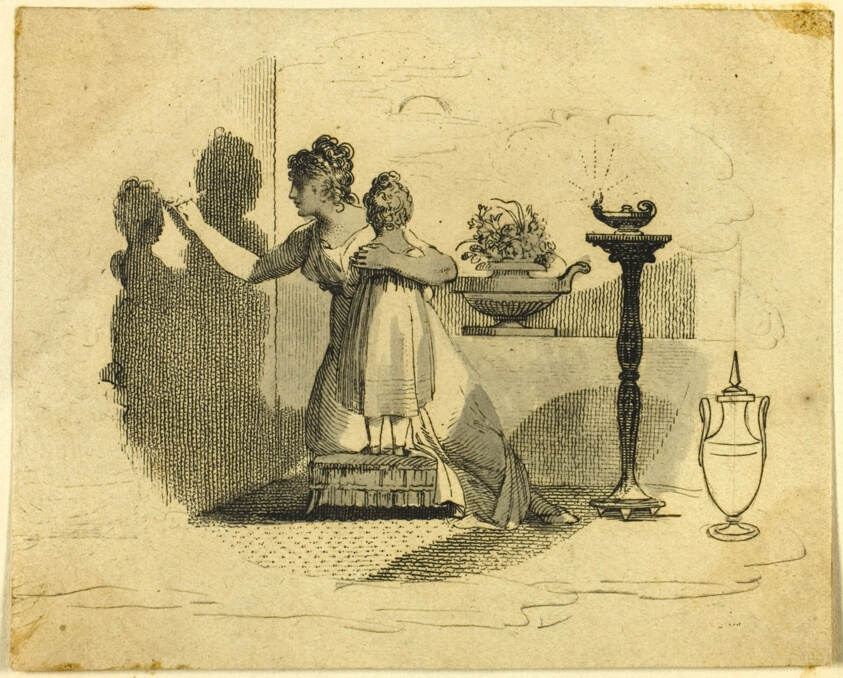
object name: Print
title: First Idea of Design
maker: after Francesco Bartolozzi; Italian, 1727-1815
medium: Etching with touches of drypoint heightened with brush and gray wash, on cream wove paper, tipped onto cream wove paper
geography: Italy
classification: etching; print; prints and drawing